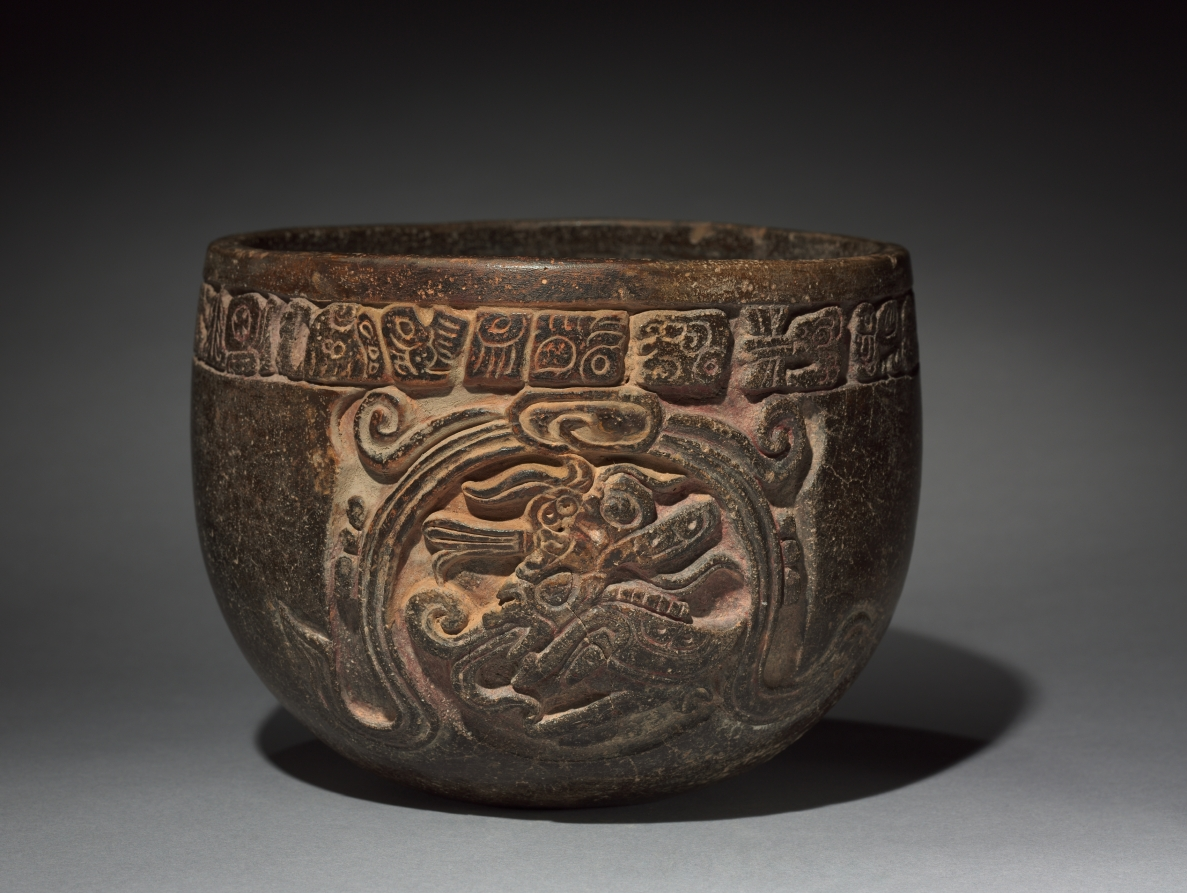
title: Carved Vessel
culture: Mexico, Campeche, Maya, Chocholá Style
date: c. 600–1000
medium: earthenware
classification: Ceramic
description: A firefly is carved on both sides of this Maya vessel, which is from the Yucatán Peninsula. Among the most common of insects to appear in Maya art, the firefly seems to be associated with things that twinkle in the dark—stars and cigars, the latter a symbol that identifies creatures of the night.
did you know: The text on the rim mentions a young man, suggesting this vessel was involved in a rite-of-passage ceremony.